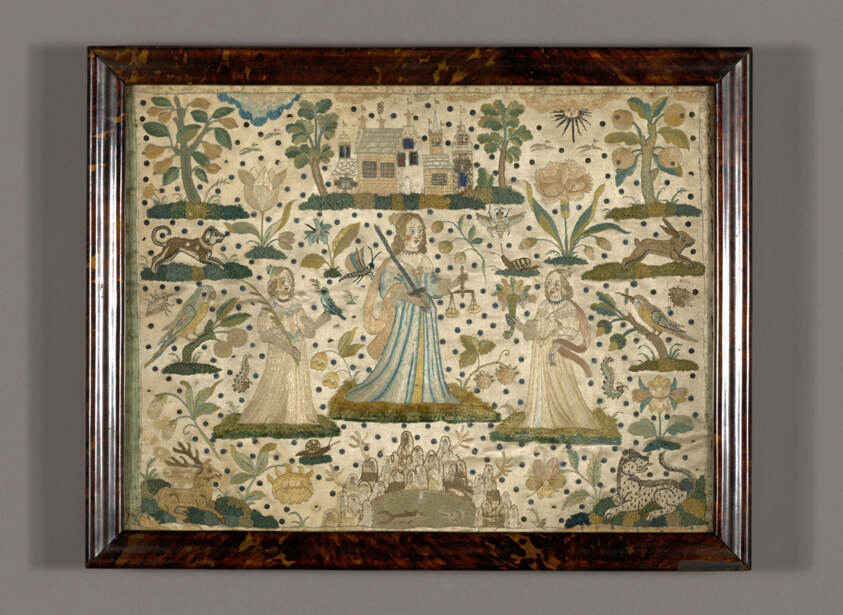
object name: Textile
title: Picture Depicting Peace, Justice, and Plenty (Needlework)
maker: England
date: 17th century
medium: Silk, warp-float faced satin weave; embroidered with silk, gilt-metal strips, gilt-metal-strip-wrapped silk, and metal purl and spangles in long-armed cross, padded satin, satin, single satin, split, and stem stitches; couching and embroidered cut pile; embellished with mica and glass beads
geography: England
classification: textile; needlework (visual works)